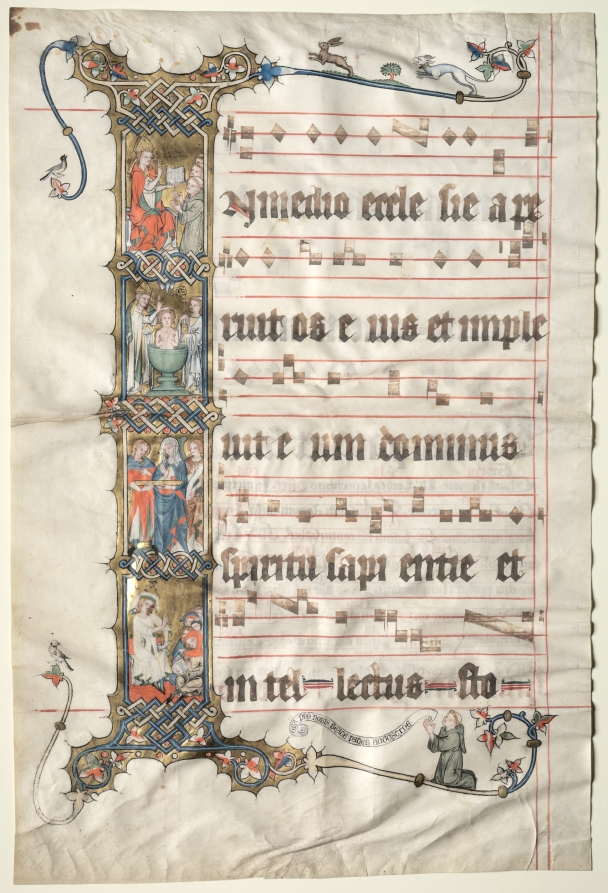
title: Leaf from the Wettinger Gradual: Historiated Initial (I) with Scenes from the Life of St. Augustine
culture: Germany, Lower Rhine (Cologne?), 14th century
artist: Second Master of the Wettinger Gradual (German)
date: c. 1330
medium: ink, tempera, and gold on parchment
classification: Manuscript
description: This imposing leaf comes from the monumental Wettinger Gradual preserved in the Canton Library in Aarau, Switzerland. The focus of the decoration consists of a single massive initial I. It is constructed with four separate compartments featuring scenes from the life of Saint Augustine. The compartments read (from top to bottom): Augustine teaching before his conversion; the dream of Augustine’s mother; Augustine’s baptism; and Augustine teaching monks. The monk in the lower margin holds a scroll that reads in Latin: “Pray for us, blessed Father Augustine.” The initial would have introduced the feast of Saint Augustine (August 28) in the Sanctorale: In medio Ecclesiae aperuit os eius (“And in the midst of the church she shall open his mouth”). Given the prominence of this initial within the gradual, and the depiction of an Augustinian canon in the lower marginal extender, the manuscript was likely produced for a community of Augustinians. Influenced by Parisian manuscript painting, the illuminators added tendril extenders supporting birds, animals, and, below, an Augustinian monk in prayer. Though nothing is known of their lives or careers, both artists have working styles related to Colognese manuscript and panel painting. It is probable that this leaf, and the parent codex from which it comes, would have originally belonged to an Augustinian religious foundation in Cologne.